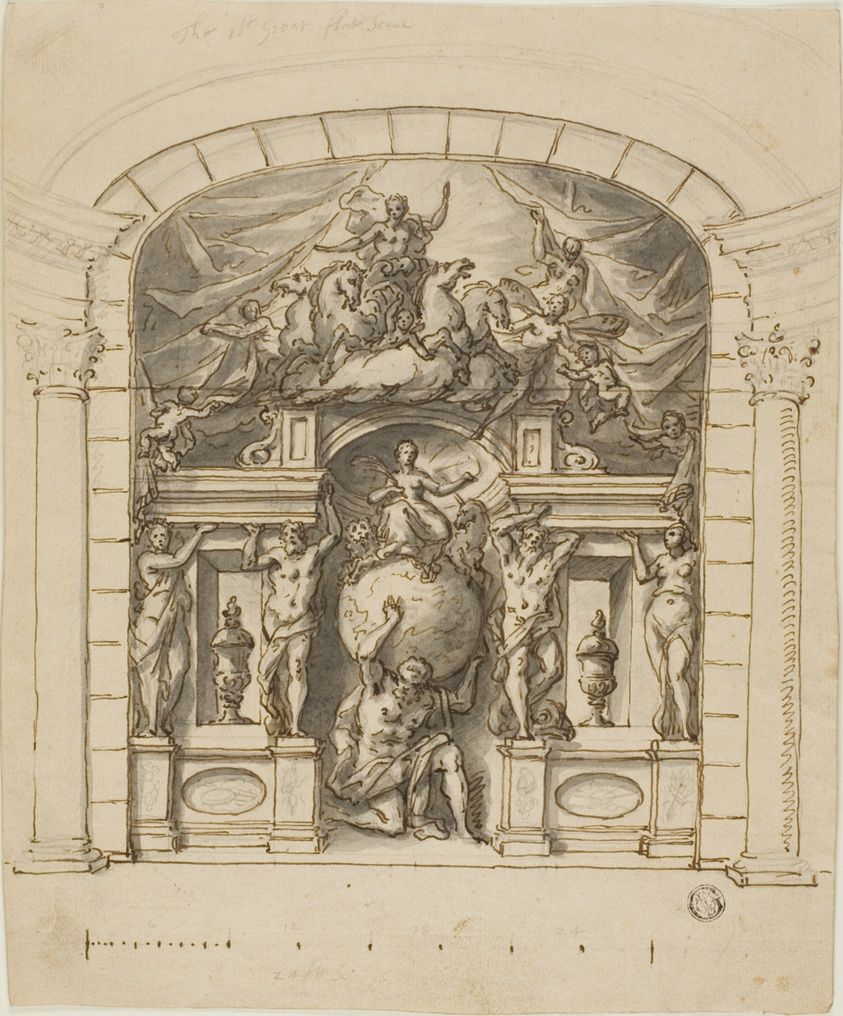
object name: Drawing and Watercolor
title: Design for Stage Scenery (Hampton Court) with Mythological Figures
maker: James Thornhill (English, 1675-1734)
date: 1695/1734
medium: Pen and brown ink with brush and gray wash, over graphite, on tan laid paper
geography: England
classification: pen and ink drawings; drawings (visual works); prints and drawing